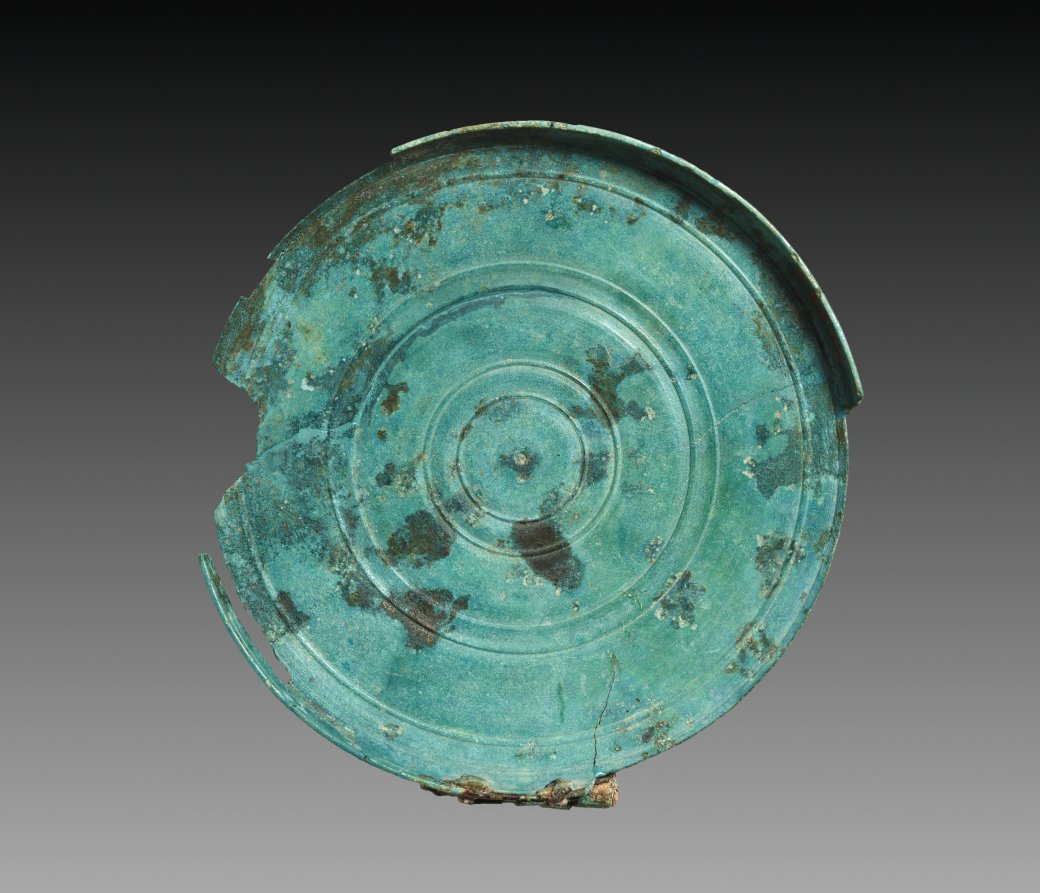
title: Box Mirror with Head of Athena (disk)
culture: Greece, Hellenistic period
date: 330–270 BCE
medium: bronze, partially gilt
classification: Metalwork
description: The ancient Greek box mirror resembles a modern, hinged makeup compact in design. While the actual mirror is the top of the bottom half of the box—a highly polished cast-bronze disk—the cover often bears relief decoration. This example features a helmeted head of Athena, a virgin war goddess not typically associated with implements of beauty. Several other aspects suggest that this Athena may have been repurposed from another object in antiquity: the striking difference in patina between relief and case; the irregular (noncircular) shape; and the method of attachment, with rivets through the relief rather than solder.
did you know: Although now green rather than golden in color, this bronze disk was once polished to a reflective sheen.